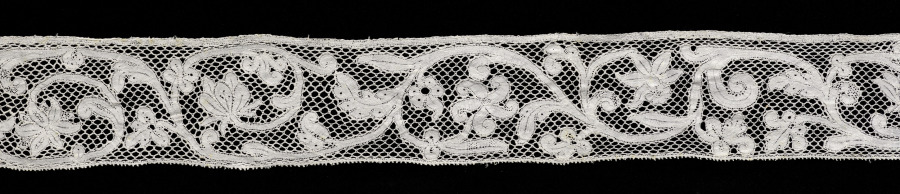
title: Lace Edging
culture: Italy, Milan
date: 1700s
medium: Linen: bobbin lace design on mesh ground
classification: Lace